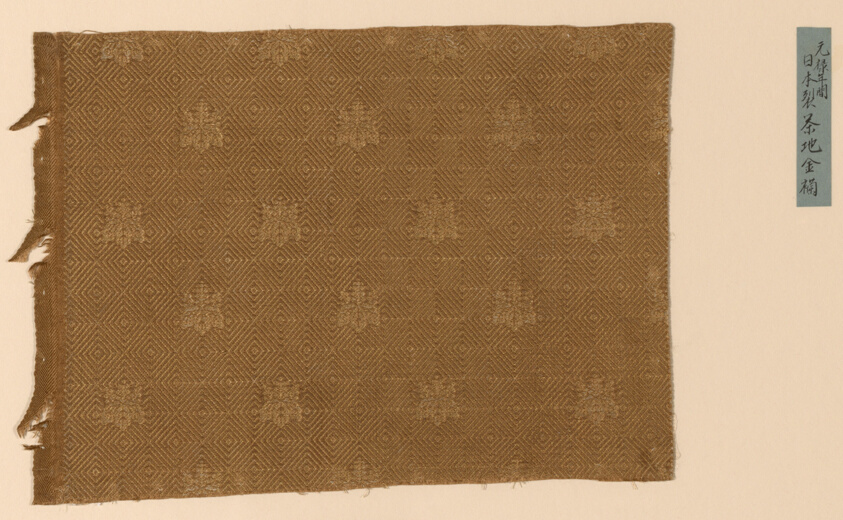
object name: Textile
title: Fragment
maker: Japan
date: 18th century, late Edo period (1789–1868)/ Meiji period (1868–1912)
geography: Japan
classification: textile; weaving